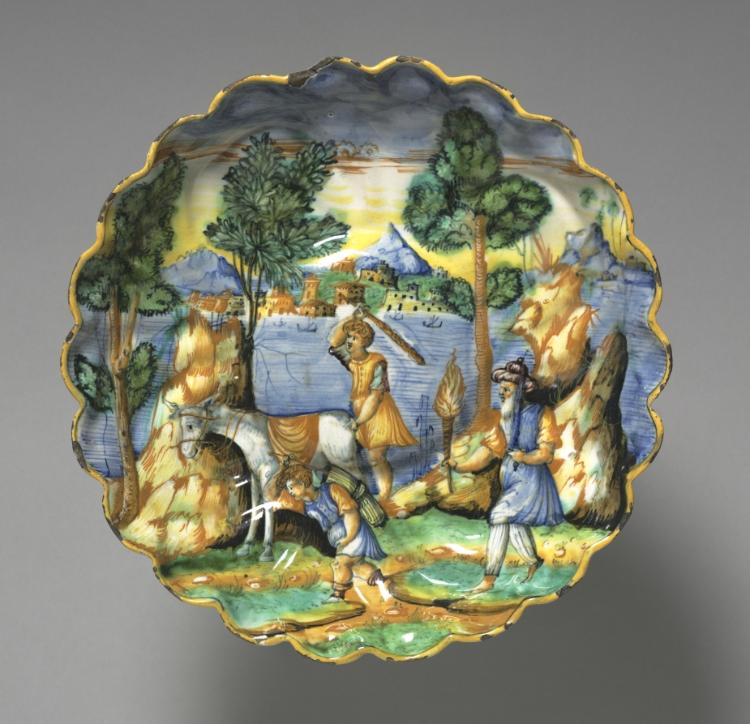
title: Footed Dish Depicting Abraham and Isaac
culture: Italy, Urbino region, Castel-Durante, 16th century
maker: circle of Ludovico and Angelo Picchi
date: c. 1545–63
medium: tin-glazed earthenware (maiolica)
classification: Ceramic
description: During the Renaissance, scenes from the Christian Bible were prominently featured on maiolica, covering the surface in a style called istoriato (decorated with stories). This plate depicts a scene an Old Testament narrative in which Abraham believes that God wants him to sacrifice his son Isaac. Before he can carry out the deed, God sends a ram to sacrifice instead.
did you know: The shape of this dish imitates the fluted, curving shape of sixteenth-century metalwork.